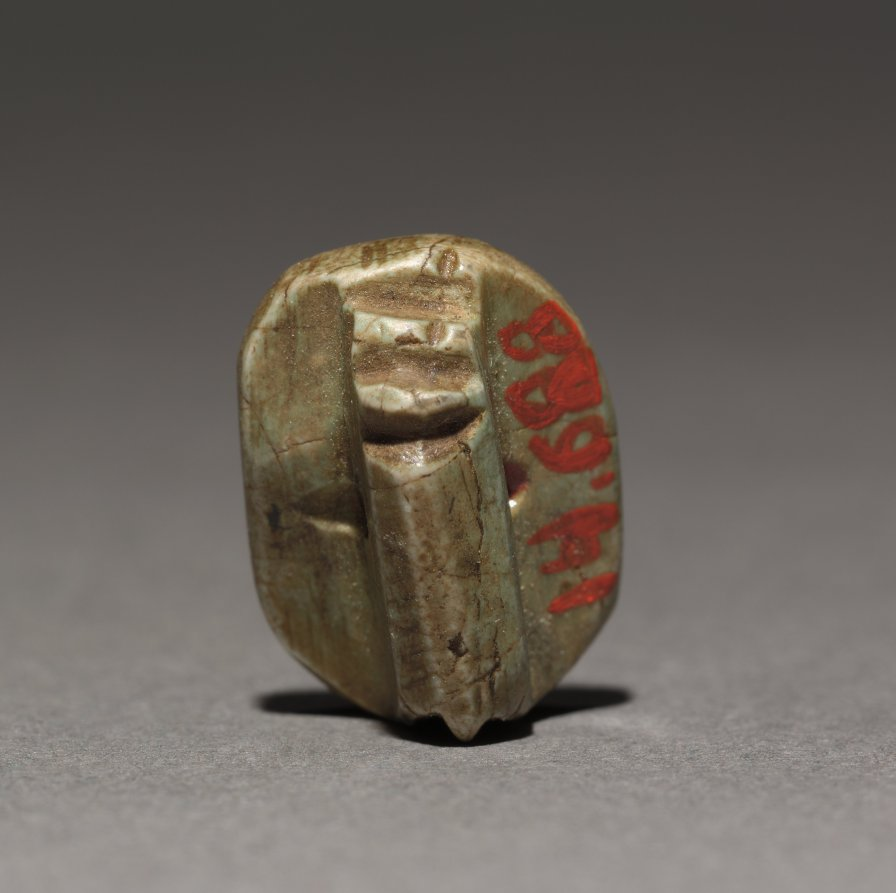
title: Seal Amulet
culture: Egypt, First Intermediate period (2123–2040 BCE), Dynasty 8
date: 2134–2124 BCE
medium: steatite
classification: Amulets